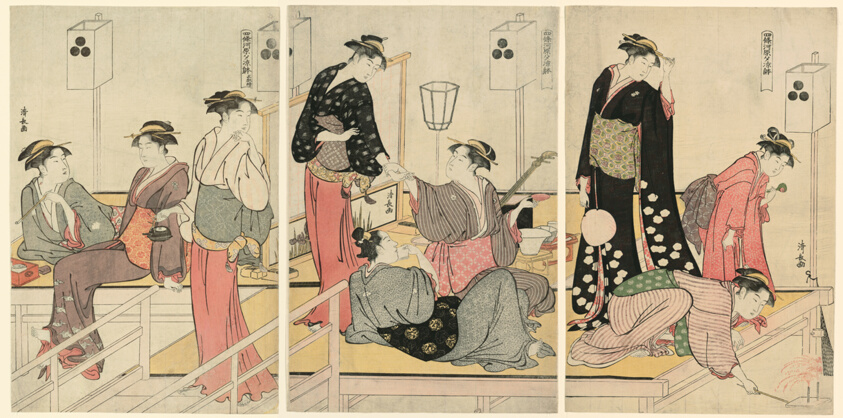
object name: Print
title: Cooling Off in the Evening at Shijogawara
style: Japanese (culture or style)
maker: Torii Kiyonaga (Japanese, 1752-1815)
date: c. 1784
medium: Color woodblock print; oban triptych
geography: Japan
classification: woodblock print; print; asian art